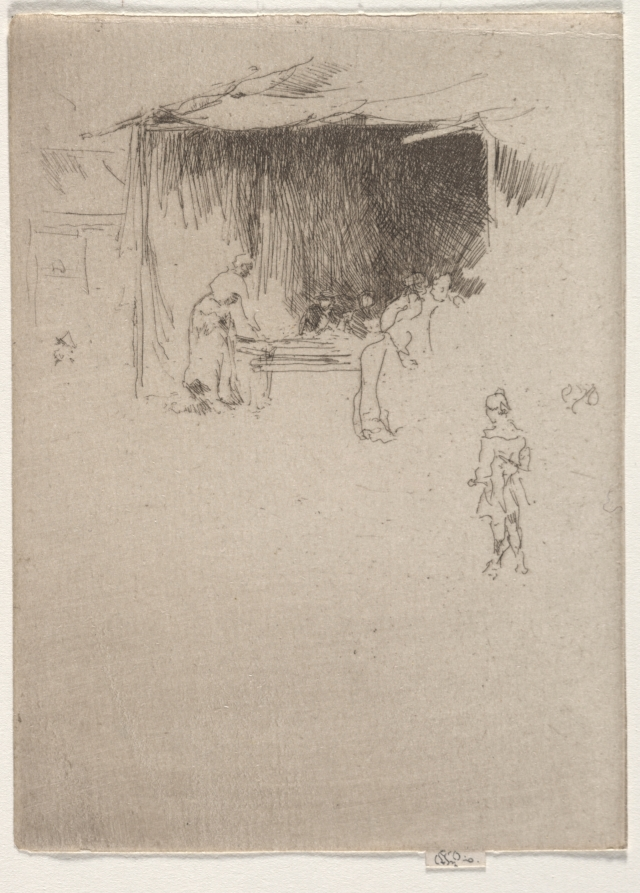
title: Booth at a Fair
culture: America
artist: James McNeill Whistler (American, 1834–1903)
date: 1886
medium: etching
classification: Print